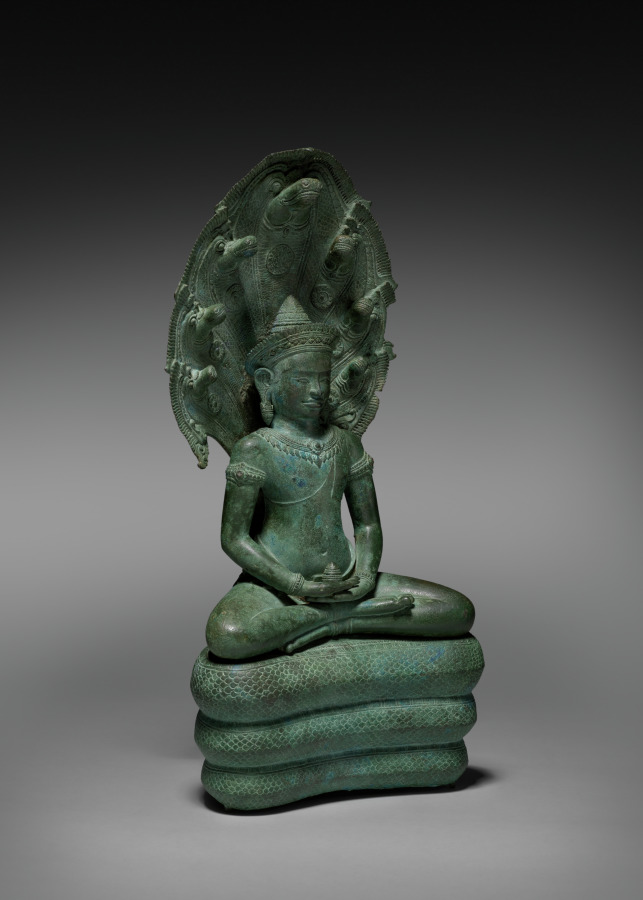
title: Naga-Enthroned Buddha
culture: Cambodia, Angkor, Angkor Wat Period, 12th century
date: 1100s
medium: bronze with traces of gilding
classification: Sculpture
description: Jayavarman VII, who built the great royal temple at Banteay Chhmar, linked himself with the image of the Buddha seated on a serpent, or naga, as the divine form under which he would be honored. During his reign, the naga-enthroned Buddha became a ubiquitous image for veneration, often set up together with Lokeshvara, who was associated with his father, and Prajnaparamita, the form under which his deceased mother was honored. Lokeshvara is the powerful enlightened being of compassion, while Prajnaparmita is the goddess who personifies wisdom. King Jayavarman VII, therefore, presented himself as the enlightened Buddha, the product of the union of Compassion and Wisdom, supported and glorified by the naga, which refers to the Khmer people. Images of the naga-enthroned Buddha have been found at Banteay Chhmar, both in architectural relief sculpture and as icons in the round. After the death of Jayavarman VII, followers of other forms of Buddhism (for example, Theravada) that became prevalent in Cambodia changed the meaning of the naga-enthroned Buddha and reinterpreted the image to refer to a scene from the historical Buddha’s life story in which a serpent protected him from a flood. The crowned and bejeweled aspect of this Buddha, though, indicates that it is another kind of transcendent figure. In his lap his hands are in a posture of meditation, holding what appears to be an offering of ceremonial rice referring to the hope that he will ensure the prosperity of the land.